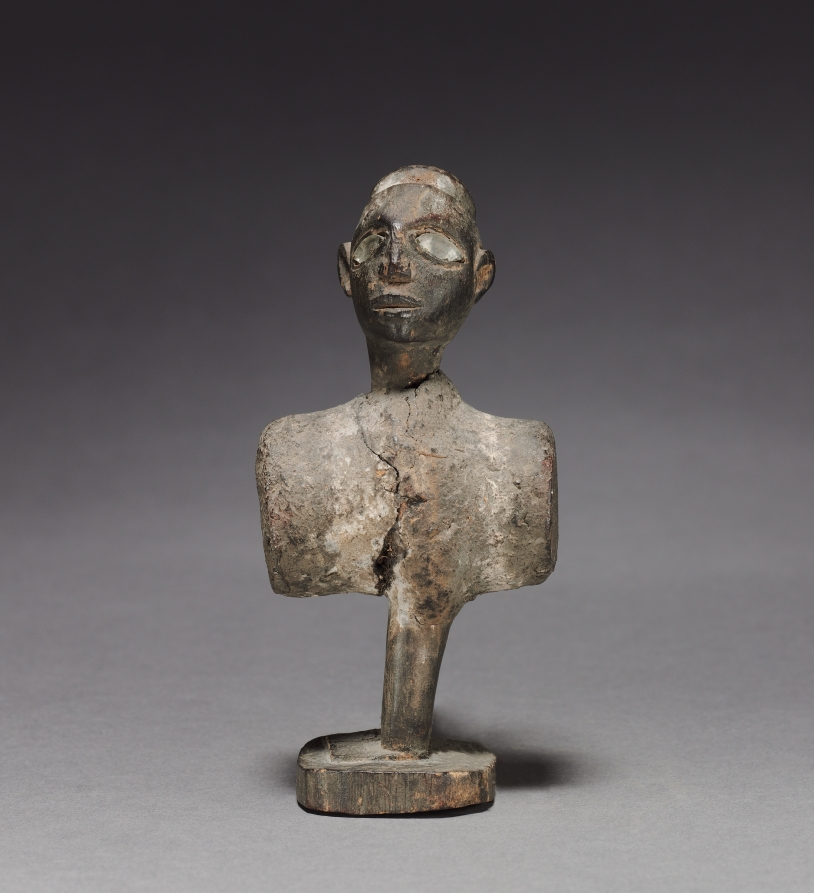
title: Power figure (nkisi)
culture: Africa, Central Africa, Republic of the Congo, Kongo-style maker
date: late 1800s-early 1900s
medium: Wood, organic materials (including resin), and metalized glass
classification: Sculpture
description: One of seven anthropomorphic figurines, these minkisi contained medicines in which an ancestral spirit was believed to reside. The medicines served a metaphorical rather than literal purpose in the resolution of conflicts among Kongo people. This figure contained white- and red-colored medicine loads on its belly and back. Its pose may refer to the nkisi’s capacity to see more than others.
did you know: The nduda minkisi were loaded with gunpowder and/or medicine to protect their owners and to shoot “witches” and other enemies.